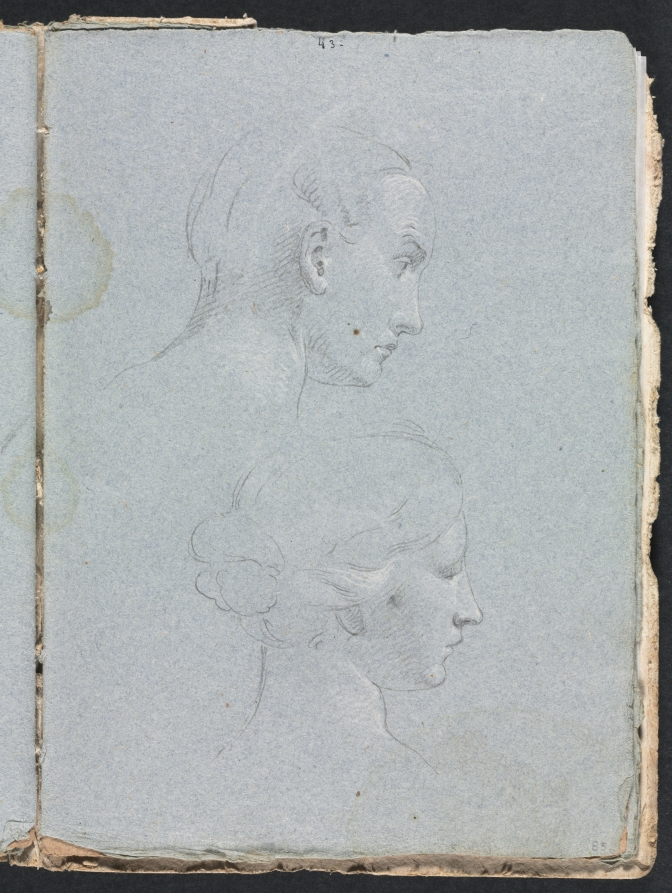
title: Verona Sketchbook: Two heads (page 85)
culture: Italy, 18th century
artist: Francesco Lorenzi (Italian, 1723–1787)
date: 1760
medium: black chalk with white heightening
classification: Bound Volume